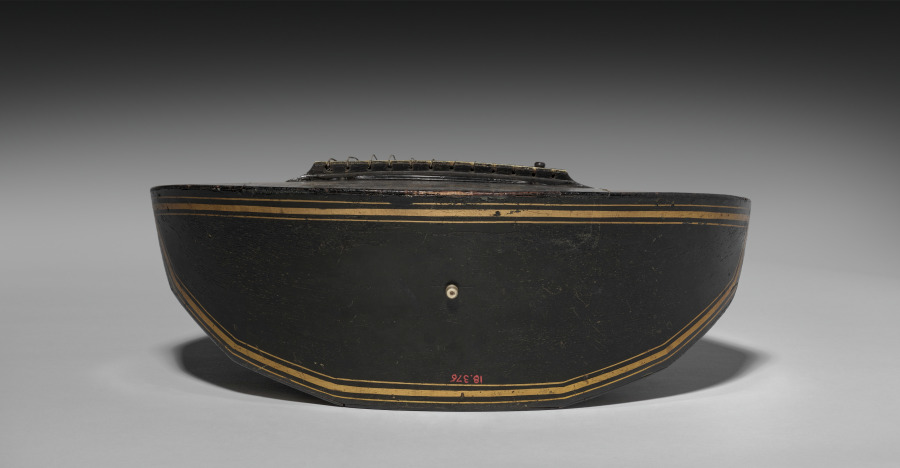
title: Harp-Lute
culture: England, London, 18th century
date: 1700s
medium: varnished wood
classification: Musical Instrument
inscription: the maker's name is illegible, but the number of the instrument is 14.